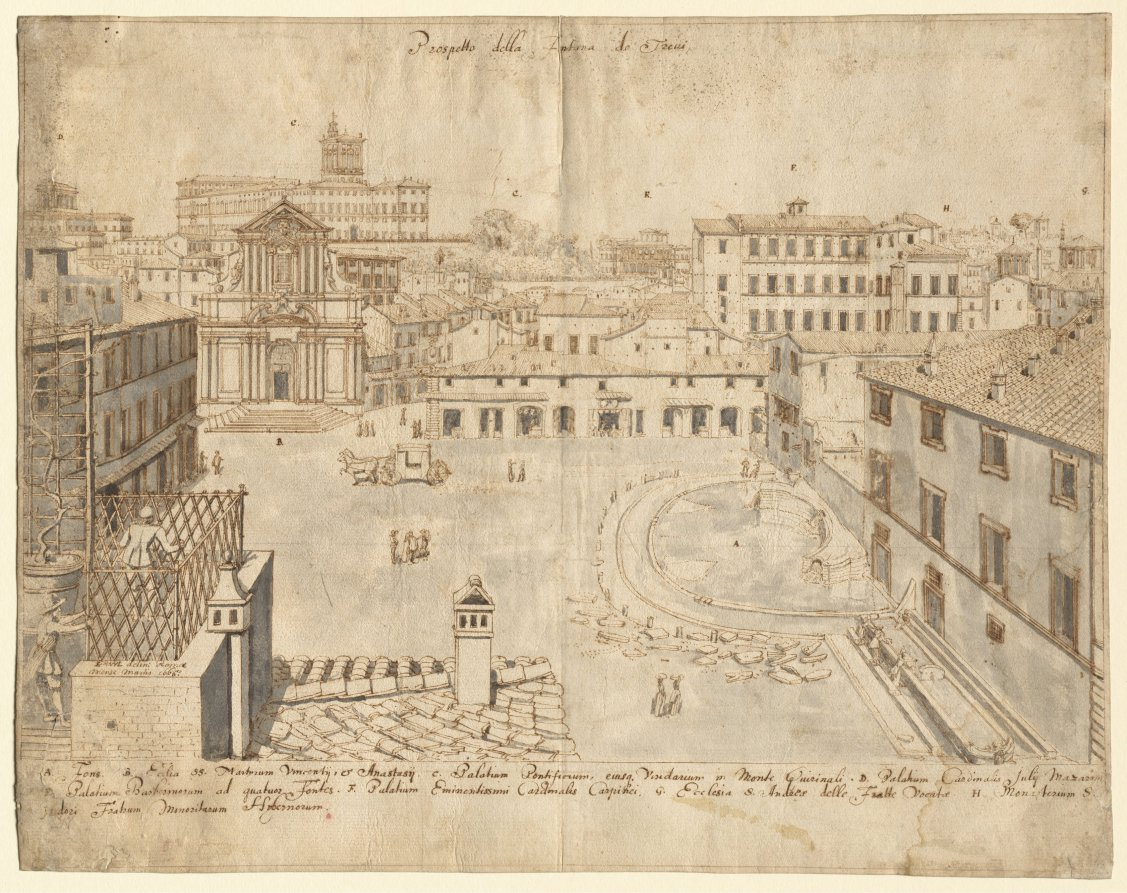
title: Eighteen Views of Rome: The Trevi Fountain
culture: Flanders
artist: Lievin Cruyl (Flemish, c. 1640-c. 1720)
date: 1665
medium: pen and brown ink and brush and gray wash over graphite; framing lines in brown ink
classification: Drawing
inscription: signed, lower left, in brown ink: [artist monogram: LC] RVYL delin: Romæ / mense martio 1665. ; by artist, upper center, in brown ink: Prospetto della Fontana de Trevi ; by artist, throughout composition, in brown ink: [the letters A-K] ; by artist, across bottom, in brown ink: A. Fons. B. Ecclia SS. Martyrium Vincentij, et Anastasij. C. Palatium Pontifiorum, eiusq. Viridarium in Mounte Quirinale. D. Palatium Cardinalis Julij Mazarini. / E. Palatium Barberiniorum ad quatuor Fontes. F. Palatium Eminentissimi Cardinalis Carpinei. G. Ecclesia S. Andreæ delle Fratte Vocatæ. H. Monasterium S. / I[si]dori Fratrum Minoritarum Hybernorum. ; ON PAPER STRIPS MOUNTED TO VERSO, lower left, in graphite: A20966 ; lower center, in graphite: E.19 ; ON PIECE OF PAPER APPLIED TO VERSO AS REPAIR, lower right, in brown ink: [illegible]